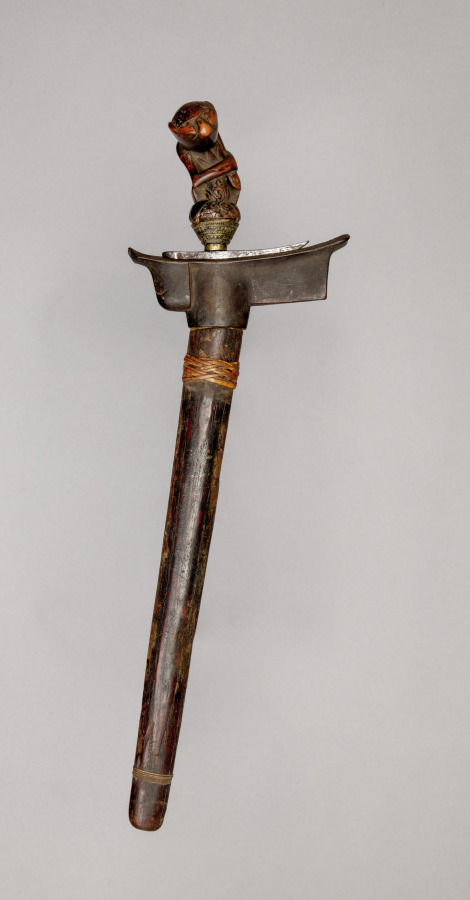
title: Sword (Kris)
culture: Java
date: 1800s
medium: iron with carved wooden handle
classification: Arms and Armor